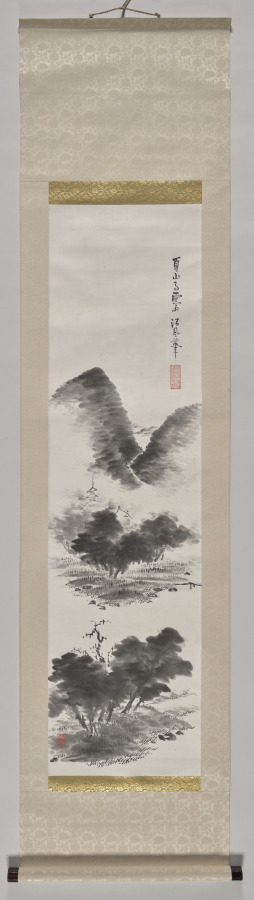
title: Rain Clearing over a Summer’s Mountain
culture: Japan, Meiji period (1868–1912)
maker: Seifū Yohei III (Japanese, 1851–1914)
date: 1893–1914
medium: hanging scroll; ink on paper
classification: Painting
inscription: The signed inscription by the artist in the painting’s upper right gives the title "Rain Clearing Over a Summer’s Mountain" and is accompanied by his Imperial Household Artist seal.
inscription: Artist's signature seal in the lower left on the grassy riverbank.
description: Before entering into his apprenticeship with Yohei II, Yohei III trained as a painter in Osaka. He continued to paint throughout his career as a ceramist. Yohei IV authenticated this painting as having been done by his father in a box lid inscription dated to the summer of 1919 . The signed inscription by Yohei III in the painting’s upper right gives the title Rain Clearing Over a Summer’s Mountain and is accompanied by his Imperial Household Artist seal. His signature seal is found in the lower left on the grassy riverbank. The composition follows a basic literati painting convention: it is divided into a foreground, middle ground, and background, with trees in the front, a temple in the middle, and mountains at the back. The brushwork, too, with its ovals of inkwash and dry-brushed dots and lines, has the casual feel of a painting made for one’s own amusement or dashed off for a friend. As part of his ceramic practice, Yohei III also made roller ends to be placed at either end of the wooden dowel around which the lower part of a hanging scroll mounting is wrapped. These served both as weights for the painting and as knobs for handling it when rolling and unrolling. The pair here, CMA 2022.152, is made of porcelain with a green glaze.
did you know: Seifū Yohei III studied to paint ink compositions in an abstracted, calligraphic way associated with well-read people who made paintings for their own amusement and as gifts for friends.